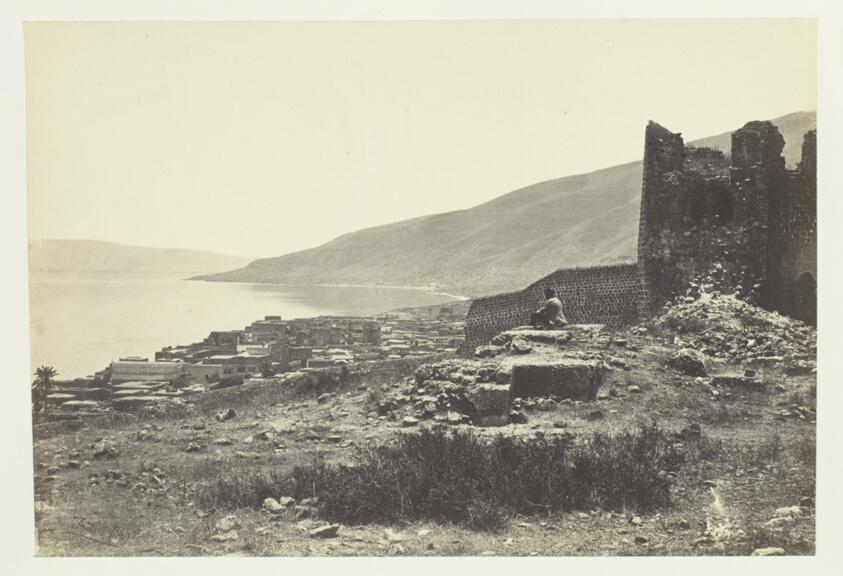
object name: Photograph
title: The Town and Lake of Tiberias, from the North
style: 19th century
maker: Francis Frith (English, 1822–1898)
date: 1857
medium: Albumen print, pl. 20 from the album "Egypt and Palestine, Volume I" (1858)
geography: England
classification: photograph; albumen silver print; photography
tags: Collected by Hugh Edwards, Egypt and Palestine